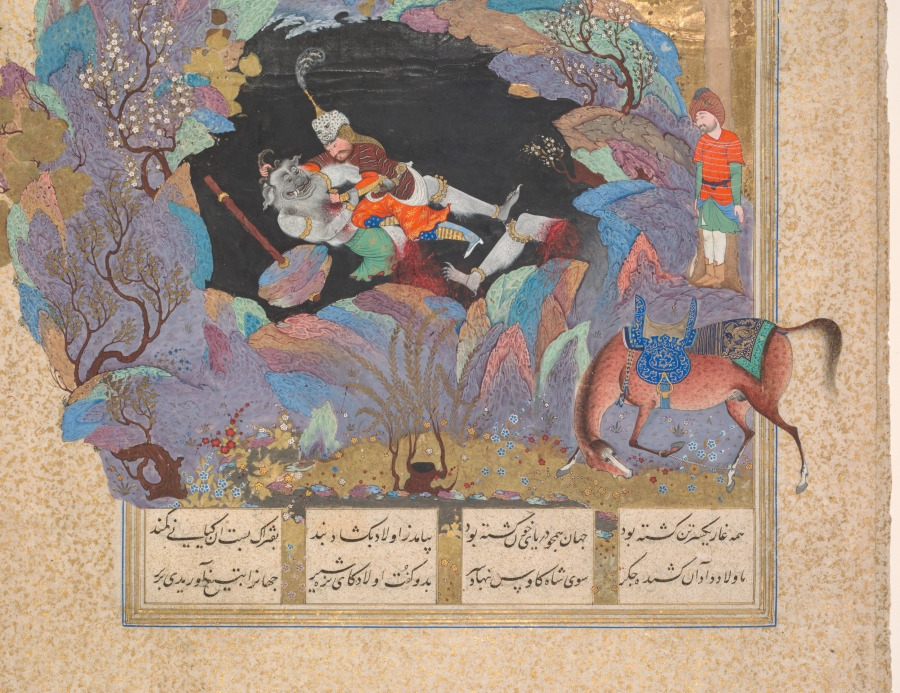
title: Rustam's seventh course: He kills the White Div, folio 124 from a Shah-nama (Book of Kings) of Firdausi (Persian, about 934–1020)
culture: Iran, Tabriz, Safavid period (1501-1722)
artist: attributed to Abd al-Vahhab (Persian, active about 1516)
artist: attributed to Mir Musavvir (Iranian, c. 1510–1555)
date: 1522–37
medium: Gum tempera, ink, gold, and silver on paper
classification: Manuscript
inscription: Script: Nasta'liq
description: The legendary hero Rustam brutally takes the demon chief’s liver blood, needed to cure his king of blindness. Paintings from the Shah-nama made for the Persian ruler Shah Tahmasp (reigned 1524–76) were acclaimed in their day for their brilliant coloring and refinement. Seven of the artists who contributed to this book moved to India to lead the new Mughal painting workshop in the 1550s. They introduced to the Indian artists a more complex color sensibility and preference for presenting faces in three-quarter view, as opposed to in profile.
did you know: Devils in the details: three peer into the White Div’s lair by the Caspian Sea.